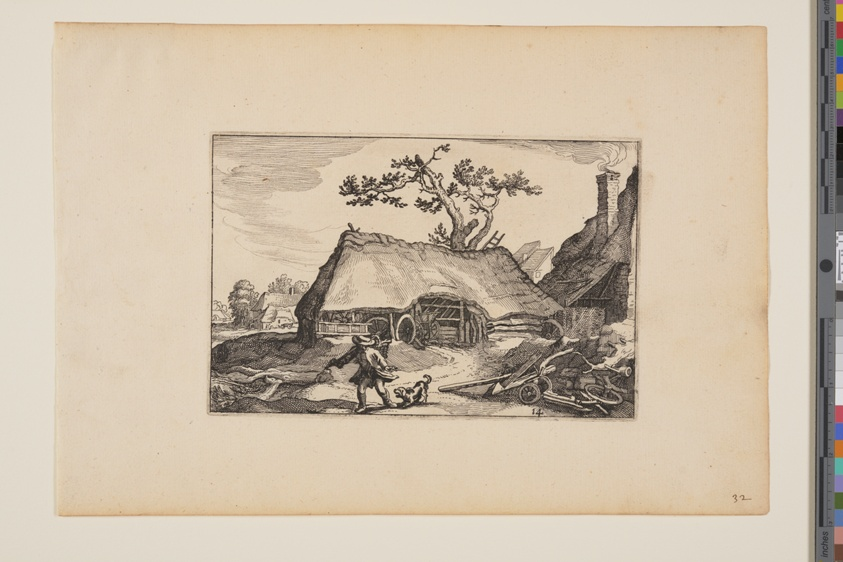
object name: Print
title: Farm with Shed for a Cart, Man with Barking Dog, from Landscapes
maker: Claes Jansz. Visscher (Netherlandish, c. 1550–c. 1612); after Abraham Bloemaert (Dutch, 1566–1651)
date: 1620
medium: Etching on ivory laid paper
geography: Netherlands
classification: print; paper; prints and drawing; etching